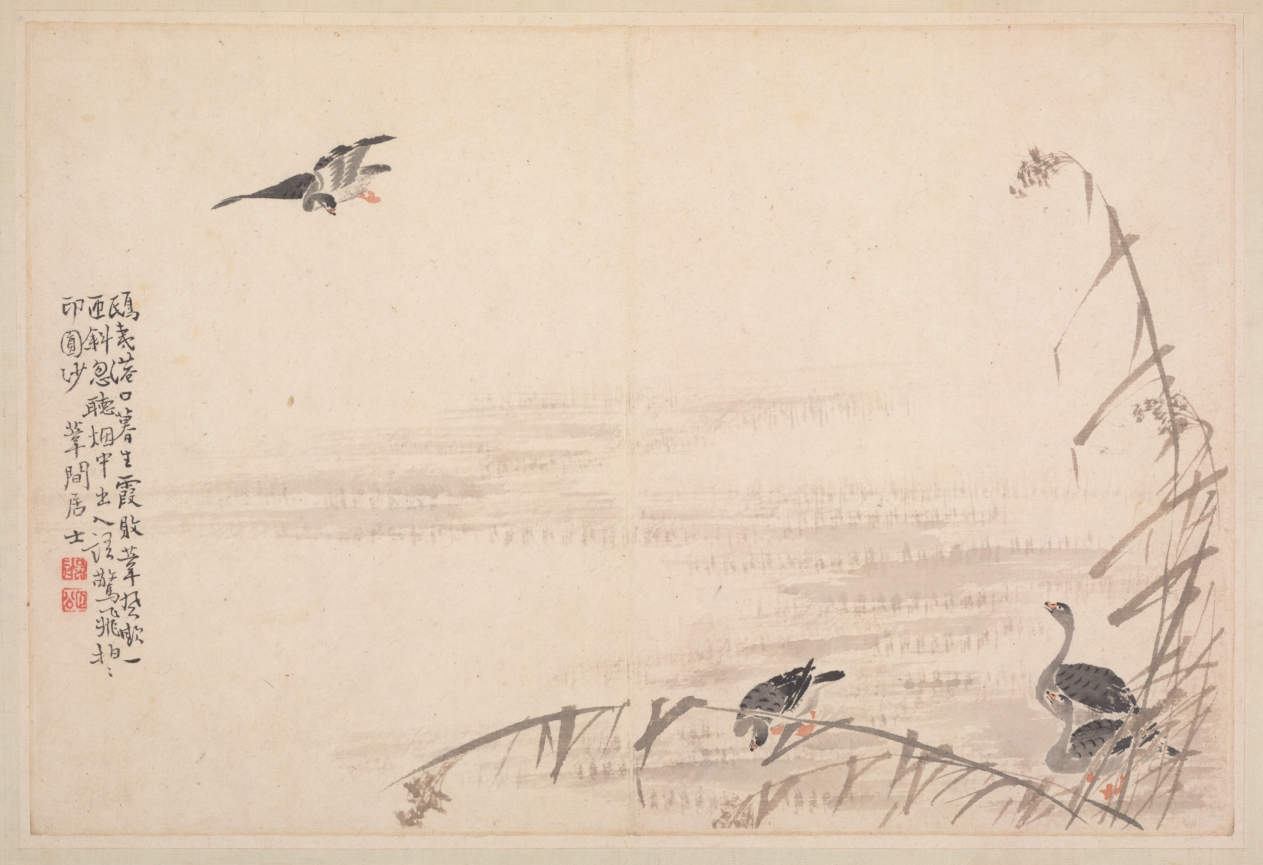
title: Album of Calligraphy and Paintings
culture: China, Qing dynasty (1644-1911)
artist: Bian Shoumin (Chinese, 1684–1752)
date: first half of the 1700s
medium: album leaf; ink and color on paper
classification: Painting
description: The artist Bian Shoumin is known for his depiction of wild geese, water, and reeds. The migrant birds in autumn and winter evoked, in the minds of the Chinese intelligentsia, a time of parting and sorrow.